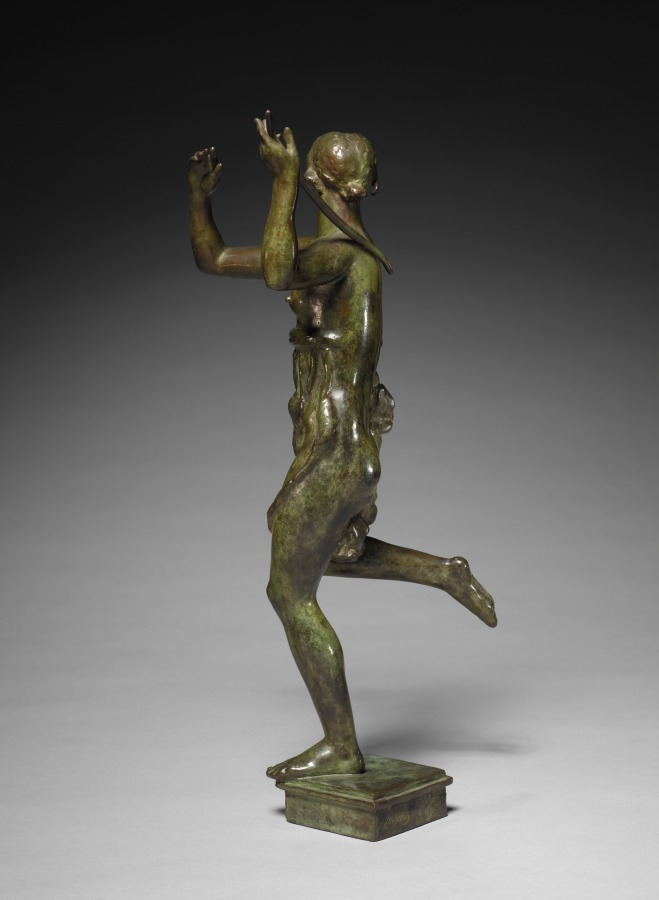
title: Diana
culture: Sweden, 20th century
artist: Carl Milles (Swedish, 1875–1955)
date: 1927–1928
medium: bronze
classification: Sculpture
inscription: Signed on back of base: "Milles"